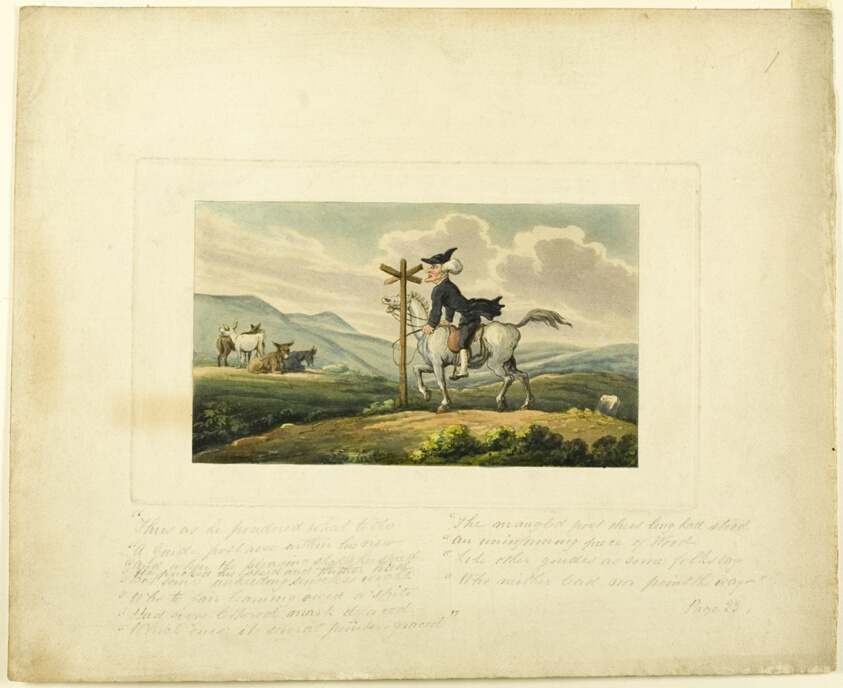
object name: Print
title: Doctor Syntax Losing His Way, from The Tour of Doctor Syntax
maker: Thomas Rowlandson (English, 1756-1827); published by Rudolph Ackermann (English, 1764-1834)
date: c. 1812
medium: Hand-colored etching and acquaint on ivory wove paper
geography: England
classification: etching; print; prints and drawing